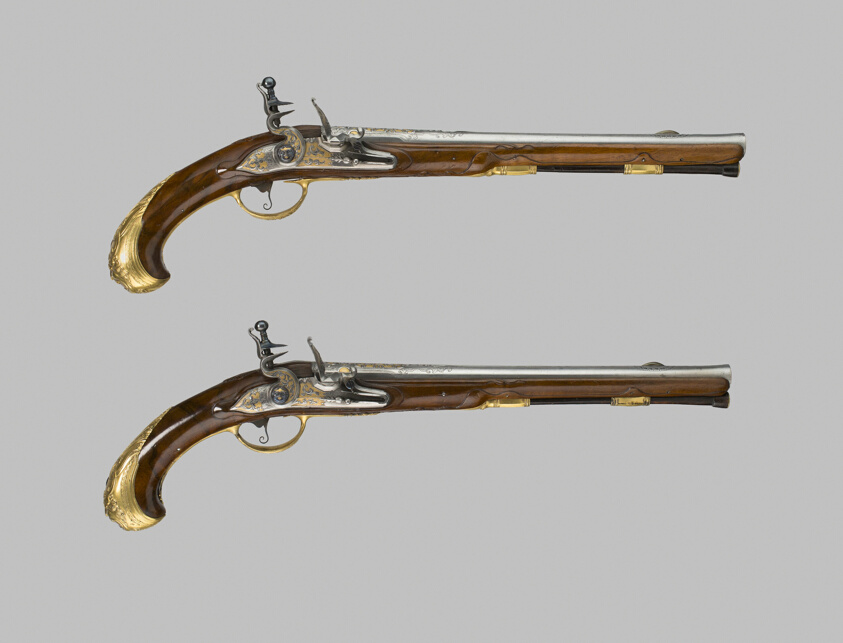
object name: Arms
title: Flintlock Holster Pistol (One of a pair)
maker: Johann Jacob Behr (Flemish, active 1690-1745); Liège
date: 1720/30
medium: Steel, brass, gilding, and walnut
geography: Liège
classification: firearm-handgun; arms; arms and armor